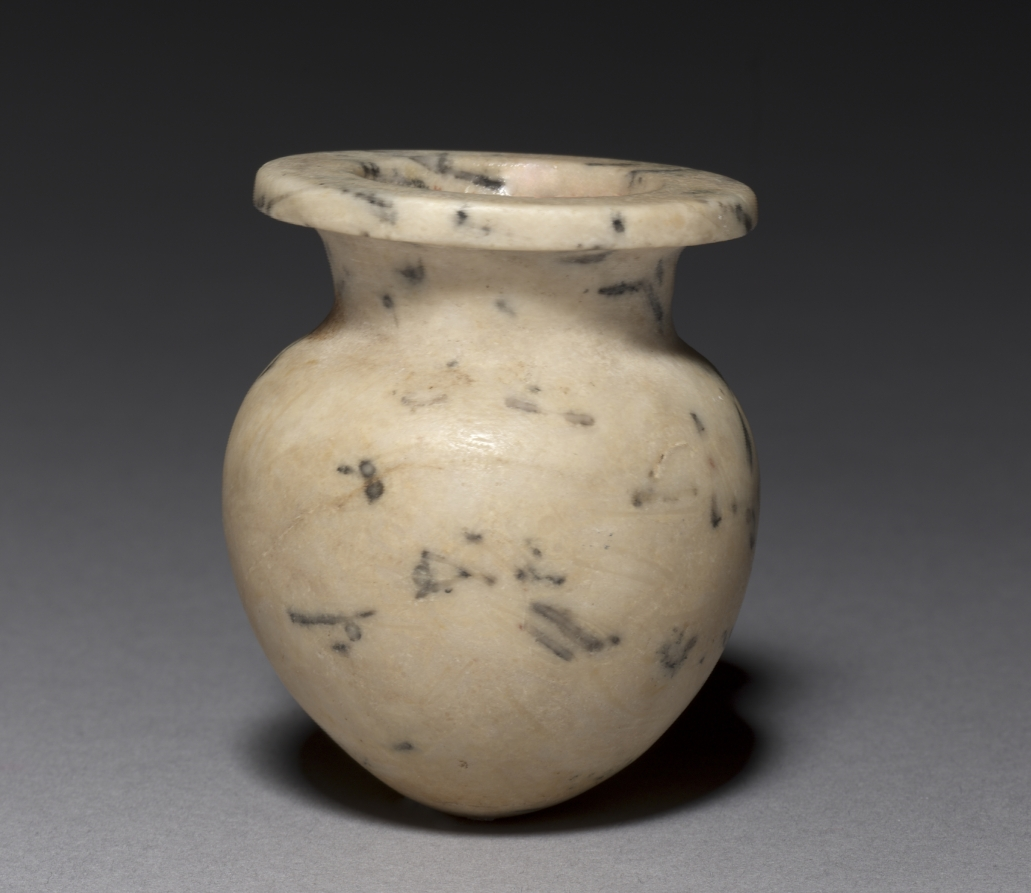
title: Collared Jar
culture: Egypt, Old Kingdom (2647–2124 BCE)–First Intermediate period (2123–2040 BCE), Dynasties 5–11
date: 2454–1980 BCE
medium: limestone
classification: Vessels